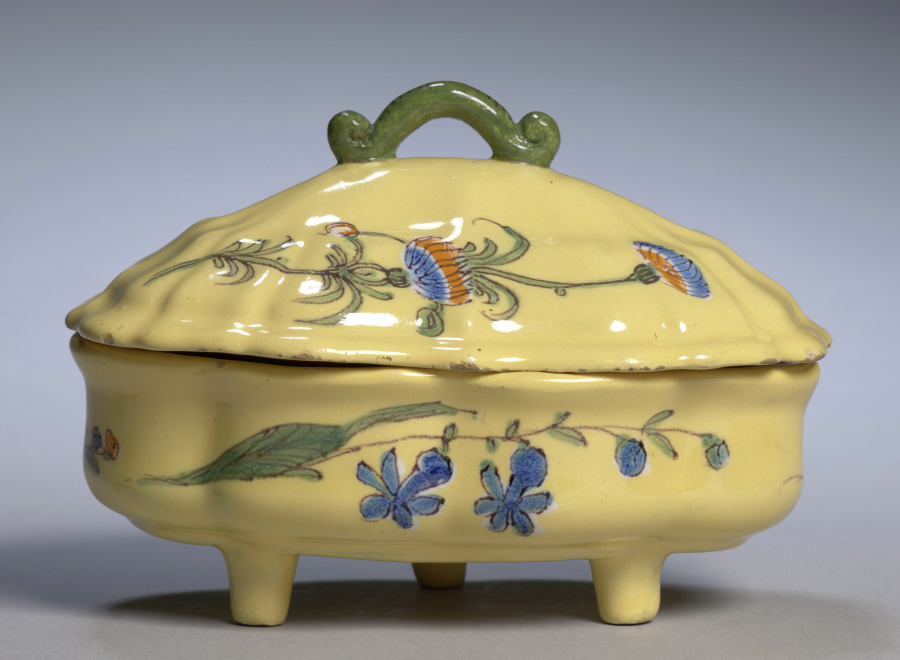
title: Covered Spice Bowl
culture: France, Montpellier, 18th century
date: c. 1775–80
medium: faience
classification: Ceramic